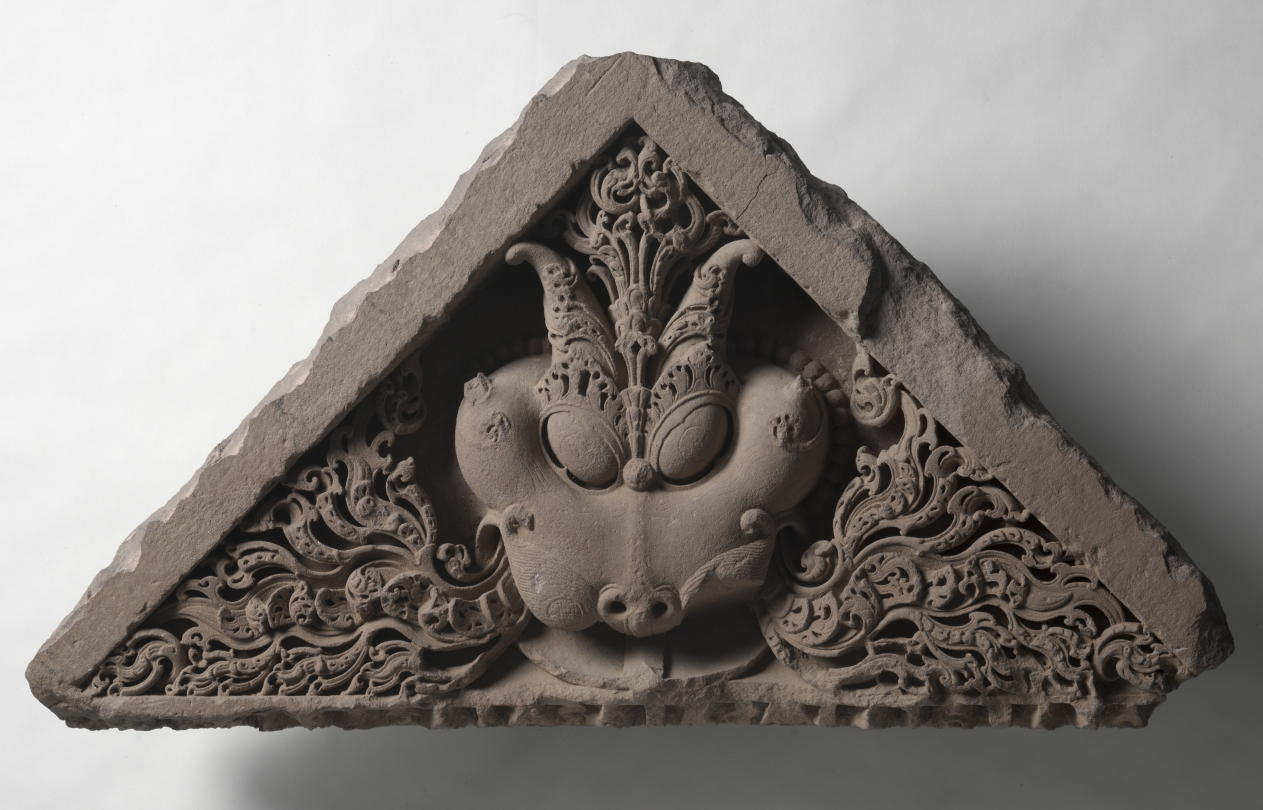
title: Pediment with the Face of Glory (Kirti-mukha)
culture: Northern India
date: c. 1000s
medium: sandstone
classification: Sculpture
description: Throughout India, sculptures of horned mythic beasts spewing stylized foliage were built into temples, above the entryways, in line with the sanctum. Known as the “face (mukha) of glory (kirti),” the protective mask emanates divine energy from the heart of the temple. The scrolling vegetation flowing from the mouth visually references the unending bounty and success that derives from worship and devotions.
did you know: Irises and pupils have been lightly incised into the bulging eyes.